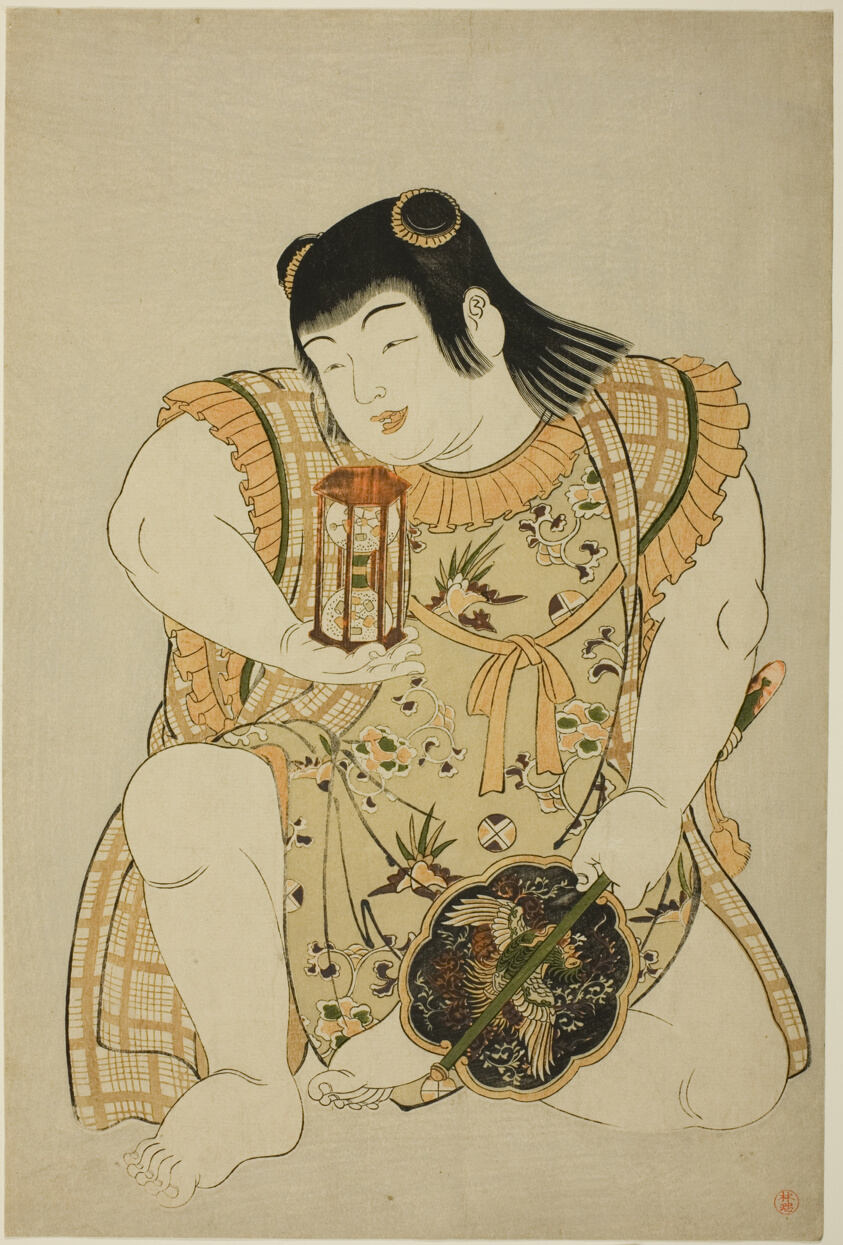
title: Boy Holding Hourglass and Chinese Fan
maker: Attrib. Kitao Shigemasa (Japanese, 1739-1820)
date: 1780s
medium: Color woodblock print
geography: Japan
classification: woodblock print; print; asian art